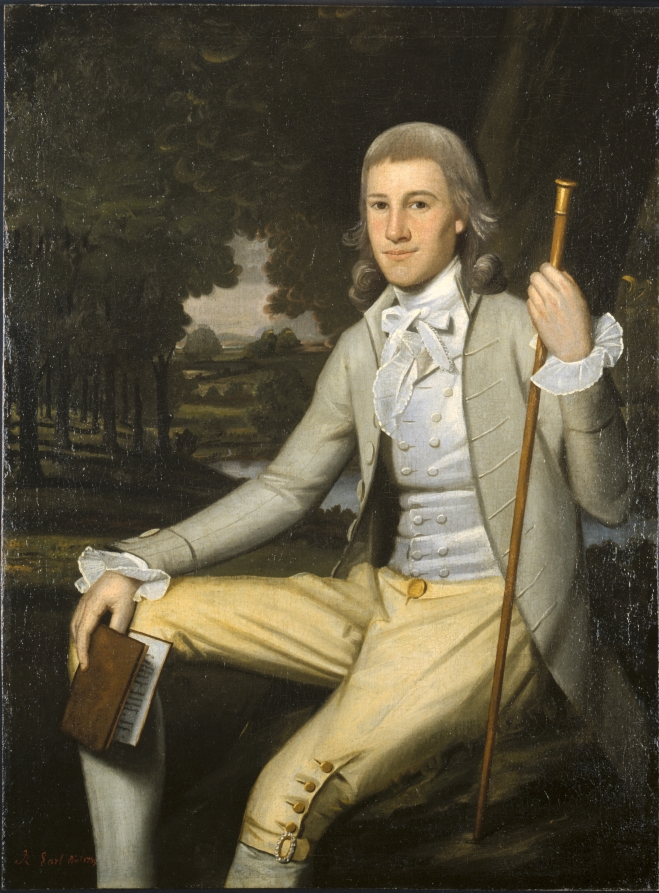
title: Moses Seymour Jr.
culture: America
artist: Ralph Earl (American, 1751–1801)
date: 1789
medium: oil on canvas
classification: Painting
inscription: Signed lower left: R Earl Pinxt 1789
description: Seen here at the age of 15, Moses Seymour Jr. holds a book and cane, suggesting that he reads and walks in harmony with nature. The portrait was commissioned by his father, a former Revolutionary War major who lived in Litchfield, Connecticut. Artist Ralph Earl was the leading painter in the Connecticut River Valley, returning there after receiving training in London.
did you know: This painting descended through the sitter's family until it was given to the museum.